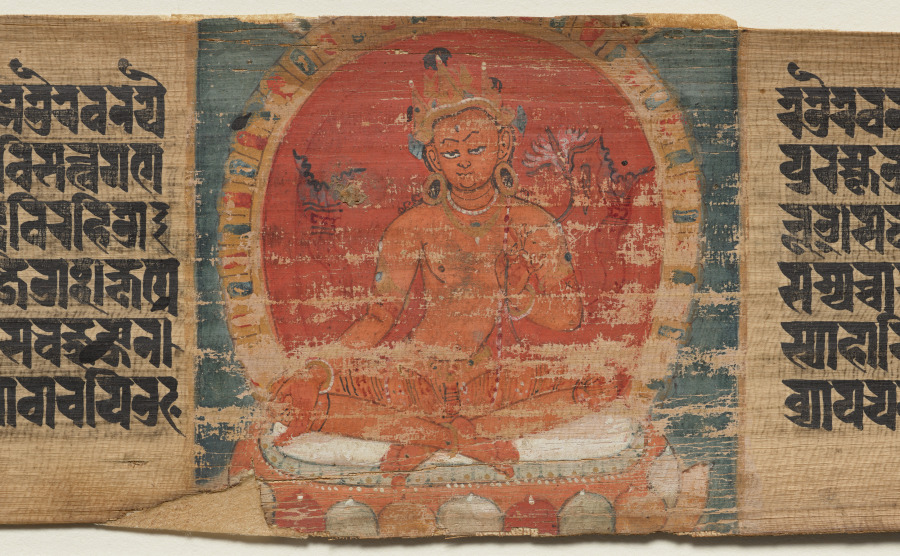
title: Preaching Amitabha with Avalokiteshvara and Manjushri, folio 186 (verso), from a Manuscript of the Perfection of Wisdom in Eight Thousand Lines (Ashtasahasrika Prajnaparamita-sutra)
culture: Eastern India, Bihar, Vikramashila Monastery. Painting: Nepal, Kathmandu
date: Sunday, September 14, 1119 (year 239 of the Newar Samvat in the month of Ashvina)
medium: Gum tempera and ink on palm leaf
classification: Painting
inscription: [gaṅgānadīvā]lukopameṣu trisāhasramahāsāhasreṣu lokadhātuṣu gaṅgānadīvālukopamān buddhān bhagavataḥ paśyati sma bhikṣusaṃghaparivṛtān bodhisattvaguṇapuraskṛtān etaireva nayairebhireva nāmabhiretairevākṣarairimāmeva prajñāpāramitāṃ bhāṣamāṇān / tadyathāpi nāma ahametarhi asminneva trisāhasramahāsāhasre lokadhātau dharmaṃ deśayāmi bhikṣusaṃghaparivṛto bodhisattvagaṇapuraskṛtaḥ, ebhireva nayairebhireva nāmabhirebhirevākṣarairimāmeva prajñāpāramitāṃ bhāṣe / so 'cintyena bāhuśrutyena śrutasāgaratayā ca samanvāgato 'bhūt, sarvāsu ca jātiṣu na jātu buddhavirahito 'bhūt / yatra yatra buddhā bhagavantaḥ saṃmukhībhūtā bhavanti, tatra tatropapadyate sma / avirahitaś ca bhavati sma buddhairbhagavadbhiḥ, antataḥ svapnāntaragato 'pi / sarve ca anena akṣaṇā vivarjitāḥ, kṣaṇasaṃpaccārāgitā // tatra khalu punarbhagavānāyuṣmantamānandamāmantrayate sma - tadanenāpi te ānanda paryāyeṇa evaṃ veditavyam - ityapīyaṃ prajñāpāramitā bodhisattvānāṃ mahāsattvānāṃ sarvajñajñānasyāhāriketi / tasmāttarhi ānanda bodhisattvairmahāsattvaiḥ sarvajñajñānaṃ pratilabdhukāmairasyāṃ prajñāpāramitāyāṃ caritavyam / iyaṃ prajñāpāramitā śrotavyā udgrahītavyā dhārayitavyā vācayitavyā paryavāptavyā pravartayita[vyā]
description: The red Buddha Amitabha is seated under a tree on a throne in the middle of the upper page; two geese—his animal emblems—perch at the top on either side. A white and red bodhisattva are on either side. This manuscript, consisting of 188 double-sided folios, was calligraphed by a scribe at a monastery in northeastern India, commissioned by a monk from Nepal. Judging from the style of the paintings, they are the work of Nepalese artists.